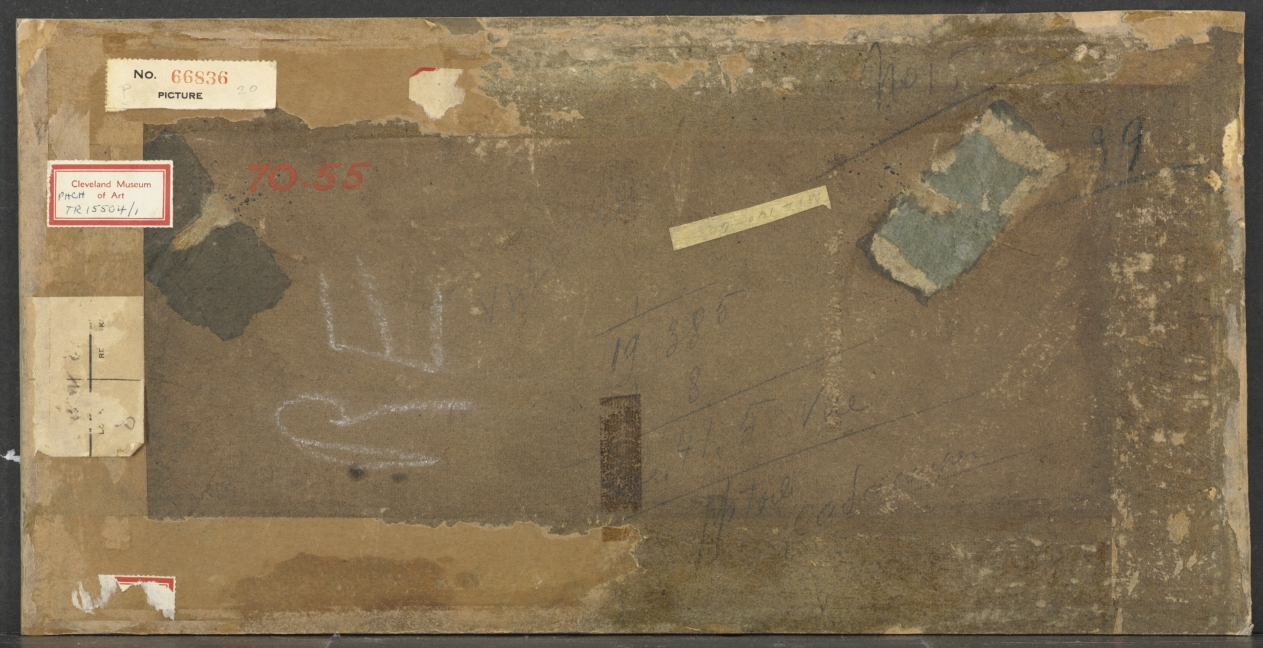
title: View of Rome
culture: France, 18th century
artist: Pierre Henri de Valenciennes (French, 1750–1819)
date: c. 1782–1784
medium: oil on paper, mounted on board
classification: Painting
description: This oil sketch showing St. Peter's Basilica in the distance was painted during the artist's stay in Rome, 1777–85. Its spontaneity and freshness is typical of the artist's outdoor paintings, in which he sought to capture the light and atmosphere of Rome.